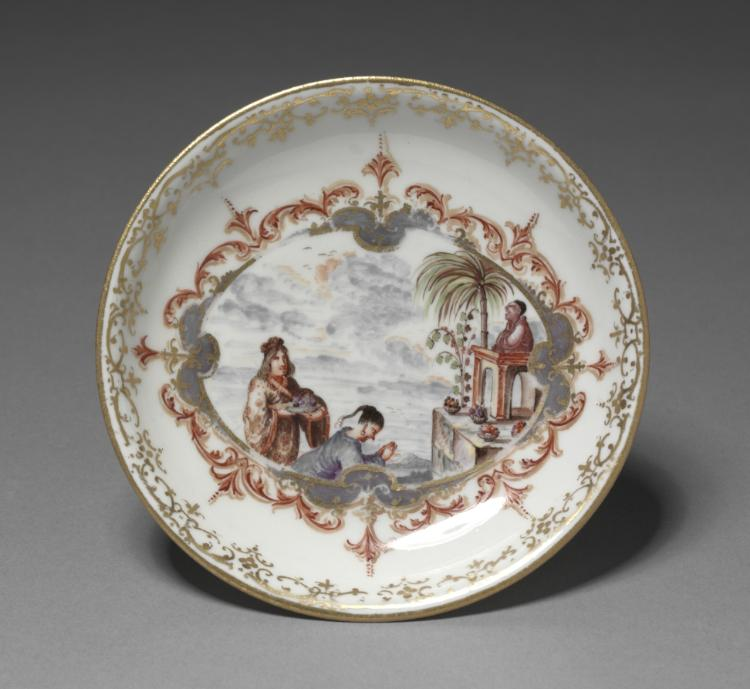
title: Saucer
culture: Germany, Meissen, 18th century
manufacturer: Meissen Porcelain Factory (German, est. c. 1710)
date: c. 1723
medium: porcelain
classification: Ceramic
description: In 1720 Johann Gregor Herold became art director of the Meissen factory and developed the styles of decoration that made it famous. Both the quality and the variety of enamel colors were improved, and the paste achieved the brilliant whiteness and perfection of surface that characterizes mature Meissen wares. Herold introduced "chinoiserie" decorations, in which comparatively large-scale half-length figures were set against landscapes with cloudy skies. The high quality of its painting suggests that Herold himself may have decorated this saucer.